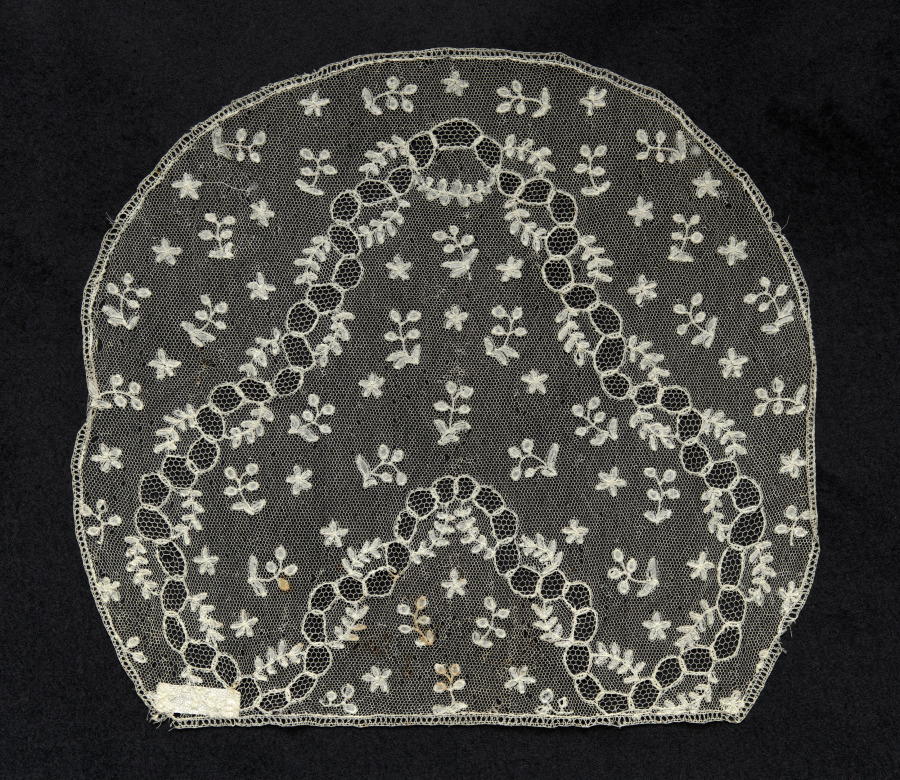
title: Lace Cap Crown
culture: Belgium, Brussels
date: mid-1700s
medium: Bobbin lace (Point d'Angleterre)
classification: Lace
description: This cap crown is late Louis XV style.